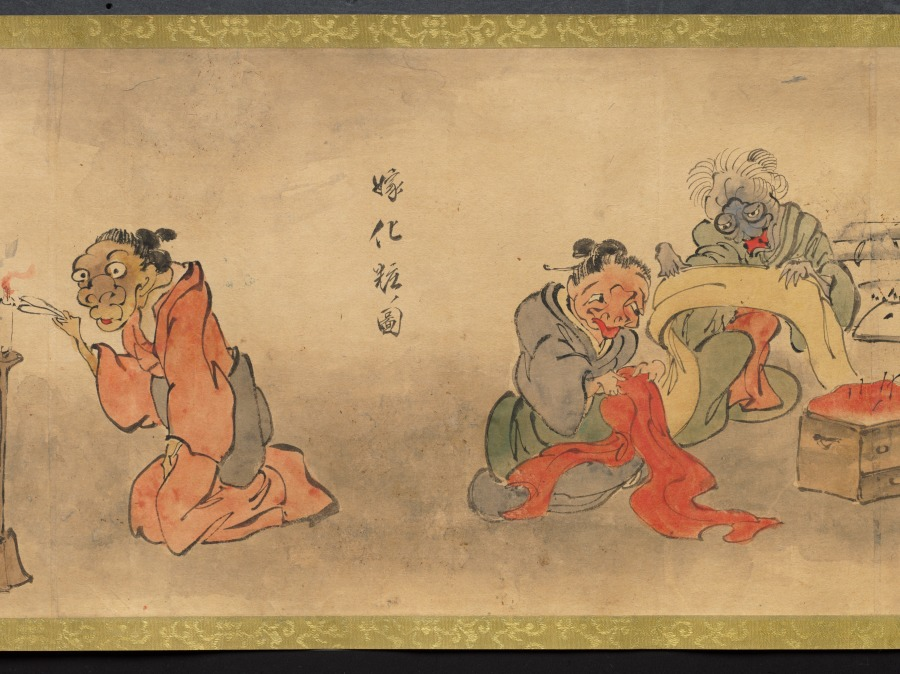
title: An Illustrated Marriage of Apparitions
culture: Japan, Edo period (1615–1868)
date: mid-1800s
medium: handscroll; ink and color on paper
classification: Painting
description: The matchmaking, engagement, wedding, and birth of the first child of two apparitions, or bakemono, literally "things that change," are illustrated in this whimsical, humorous handscroll. Japanese folklore abounds with such strange creatures, most famously represented in handscrolls featuring a procession of 100 supernatural monsters. Aside from a textual preface and cartouches indicating the content of the scenes, the tale is told visually. The artist and whereabouts of the original handscroll are unknown, but a number of other 19th-century copies by amateur painters exist in Japanese collections, attesting to its broad appeal.